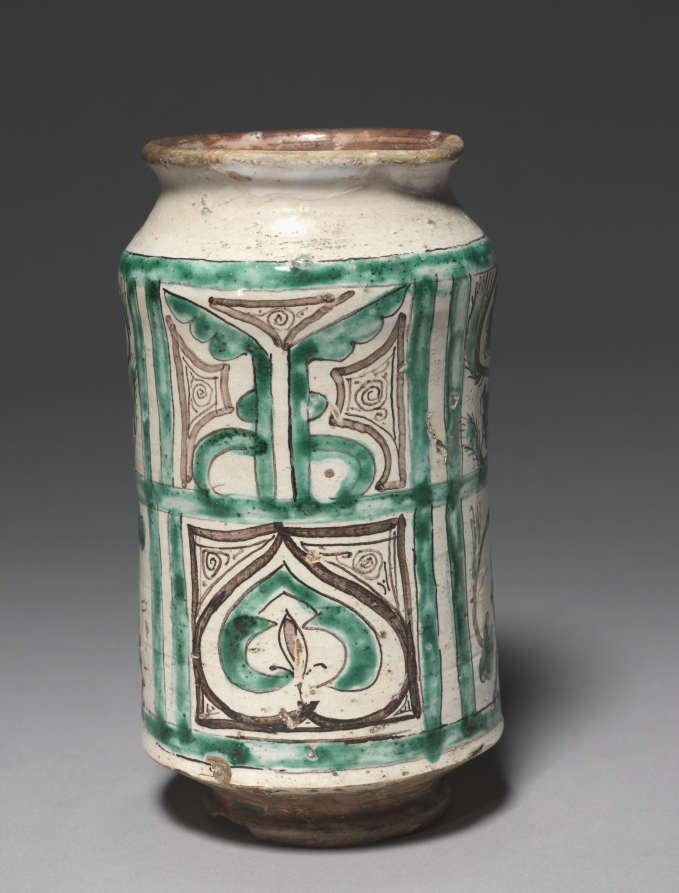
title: Albarello with Two Rabbits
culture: Spain, Paterna, 14th century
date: 1300s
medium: tin-glazed earthenware (maiolica)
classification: Ceramic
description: This albarello, a cylindrical jar used to store dry medicinal herbs, exemplifies the wares of Paterna, near Valencia. Its decoration is dominated by the crest of the Luna family, Lords of Paterna, under which two rabbits are shown nibbling on a grapevine. These vessels were commonly used in spice stores and hospital pharmacies.